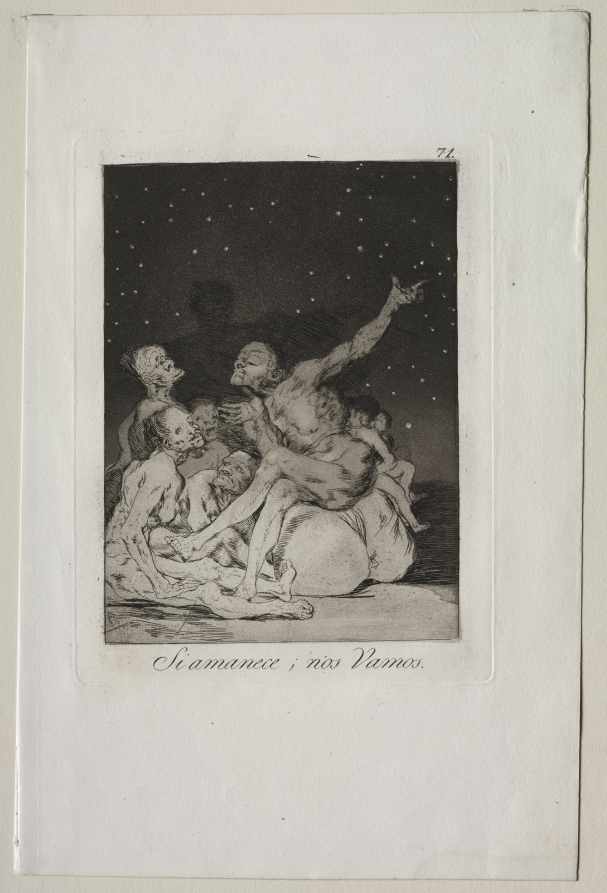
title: When Day Breaks We Will Be Off, Plate 71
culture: Spain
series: Los Caprichos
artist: Francisco de Goya (Spanish, 1746–1828)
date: 1799 (printed c. 1855)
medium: etching and aquatint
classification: Print